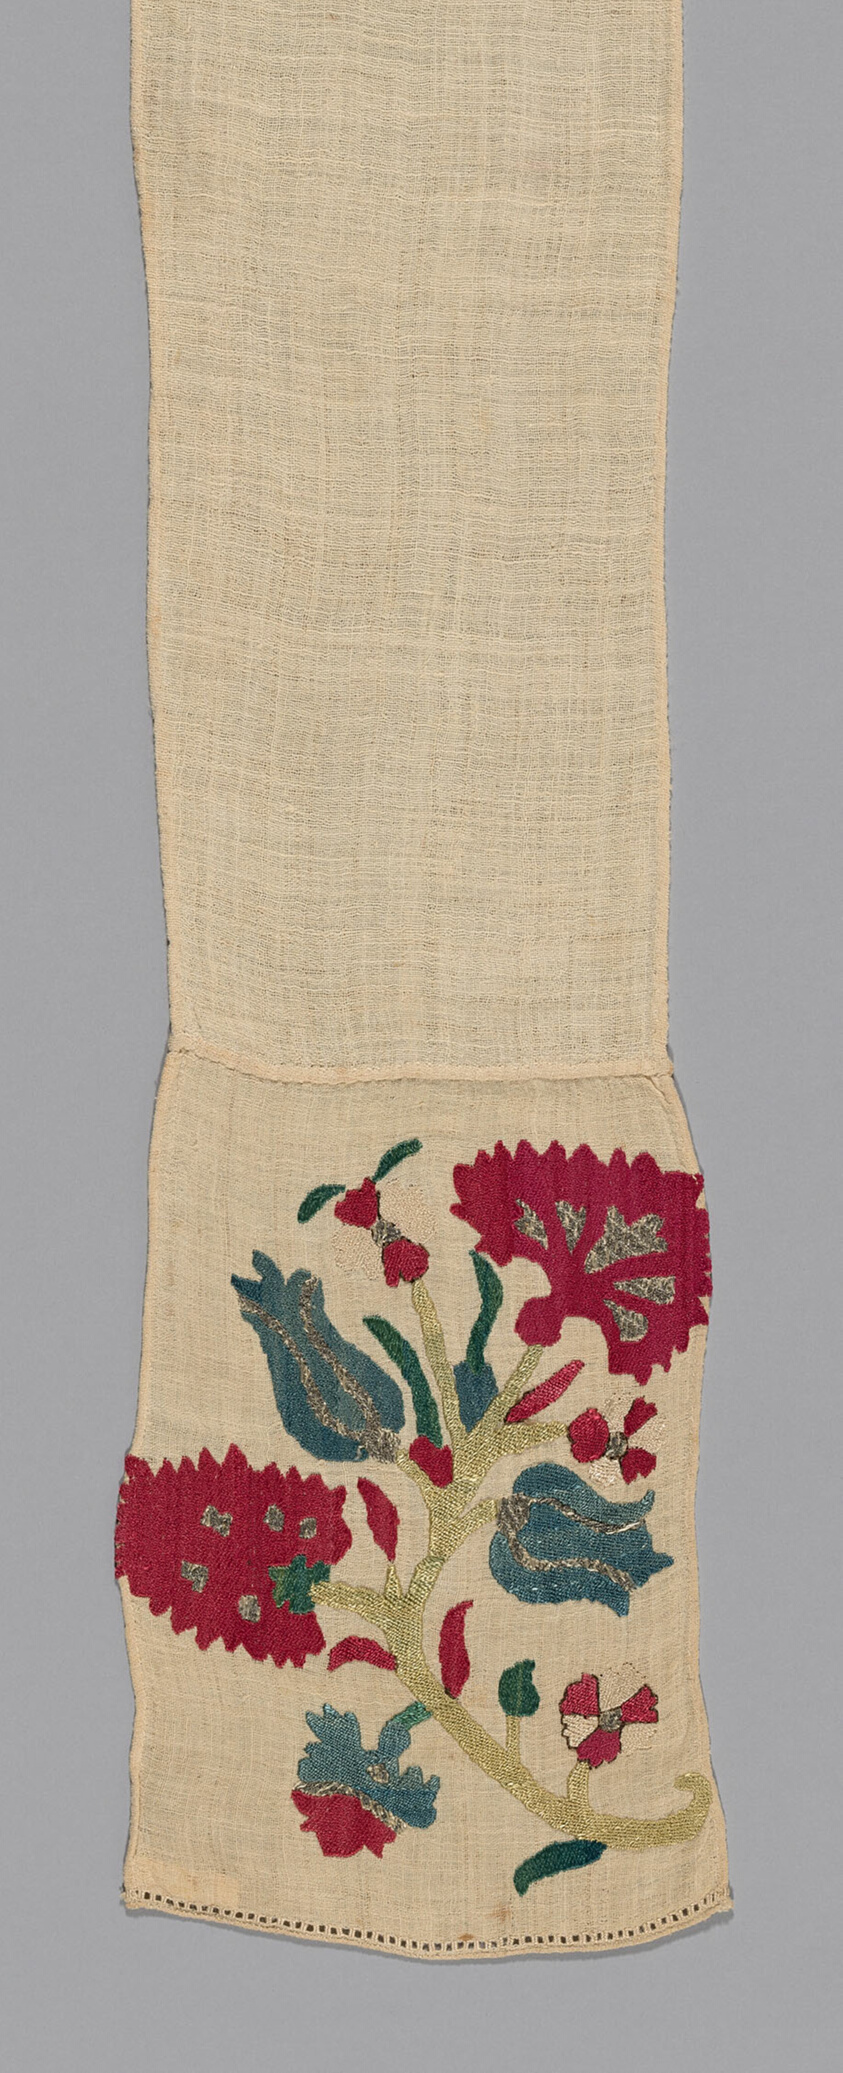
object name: Costume and Accessories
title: Sash or Scarf Fragment (?)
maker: Turkey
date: 17th century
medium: Embroidered.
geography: Turkey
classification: textile; weaving; needlework (visual works); costume